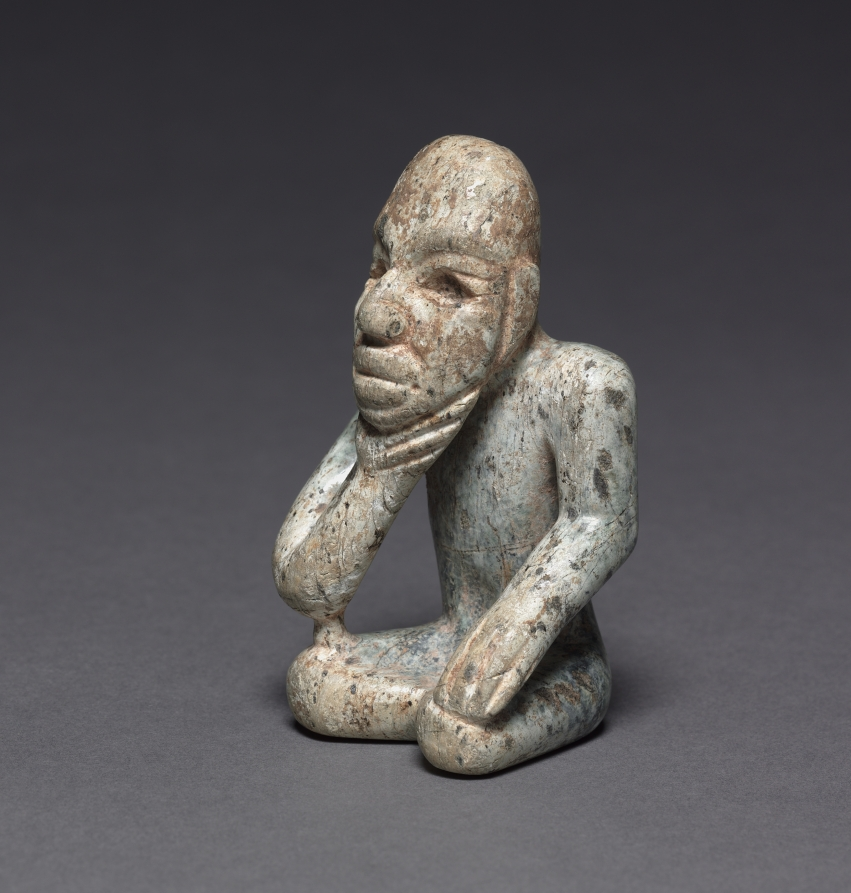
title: Seated Figure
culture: Mesoamerica, Mexico, Olmec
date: 1200–300 BCE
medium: jade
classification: Jade